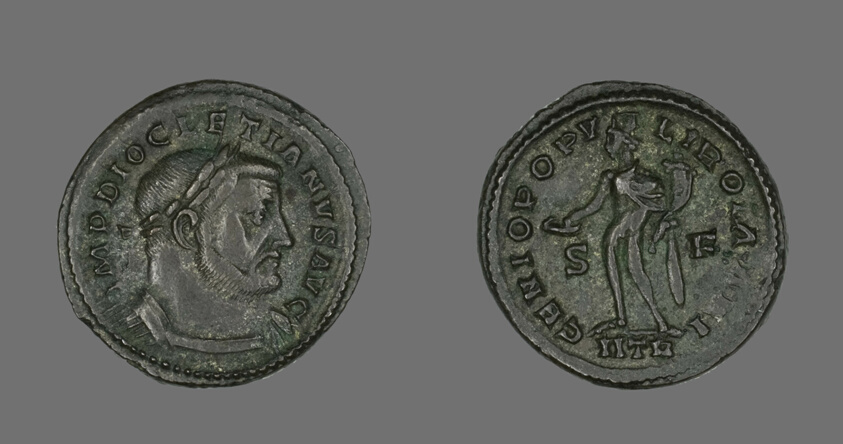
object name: Coin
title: Coin Portraying Emperor Diocletian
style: roman (ancient, style or period)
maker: Roman, minted in Trier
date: 302-303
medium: Bronze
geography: Trier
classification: coin; ancient art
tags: portrait